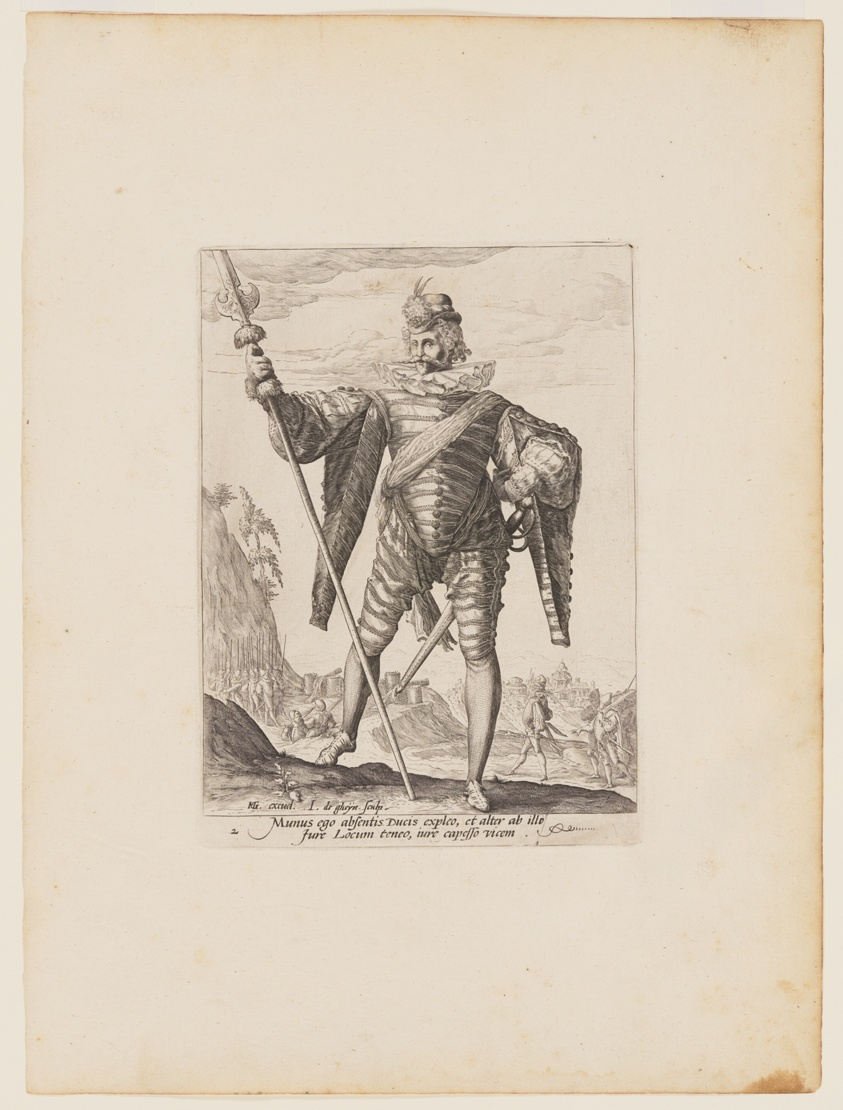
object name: Print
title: Lieutenant-Colonel, from Officers and Soldiers of the Bodyguard of Emperor Rudolph II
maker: Jacques de Gheyn II (Dutch, 1565–1629); after Hendrick Goltzius (Dutch, 1558–1617)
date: 1587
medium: Engraving on ivory laid paper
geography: Netherlands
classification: engraving; paper; print; prints and drawing